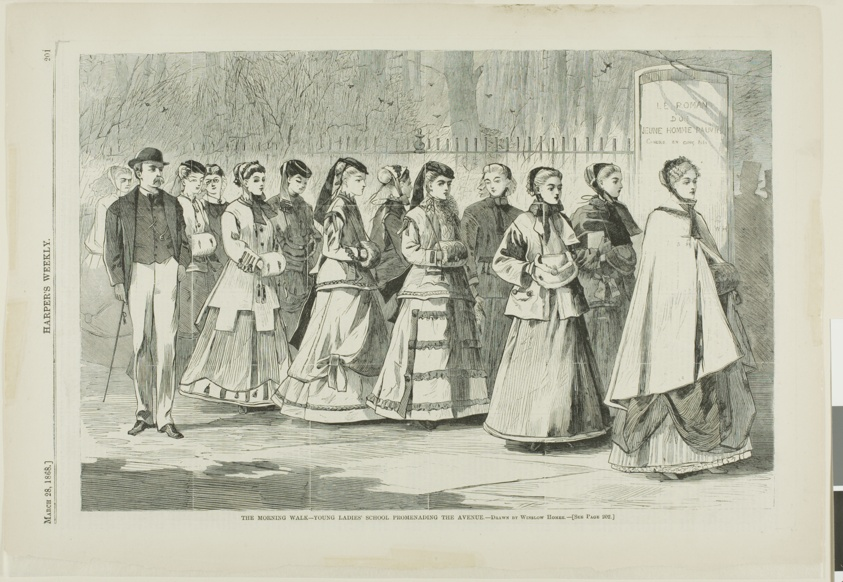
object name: Print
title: The Morning Walk—Young Ladies' School Promenading the Avenue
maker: Winslow Homer (American, 1836-1910); published by Harper's Weekly (American, 1857-1916)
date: published March 28, 1868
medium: Wood engraving on paper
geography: United States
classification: wood engraving; print; prints and drawing